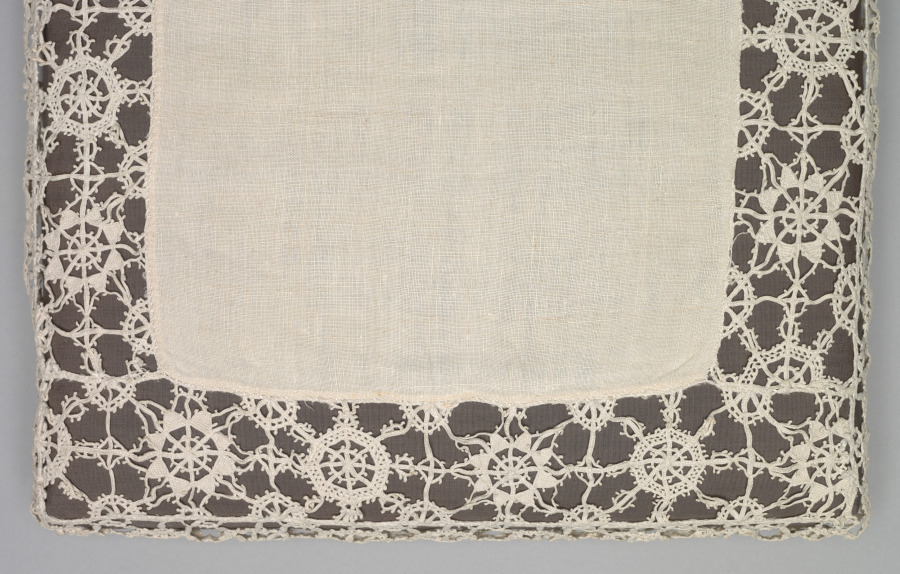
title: Lace Pillow Cover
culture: Italy, Genoa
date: 1600s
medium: Linen: needle lace (reticella) and bobbin lace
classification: Lace